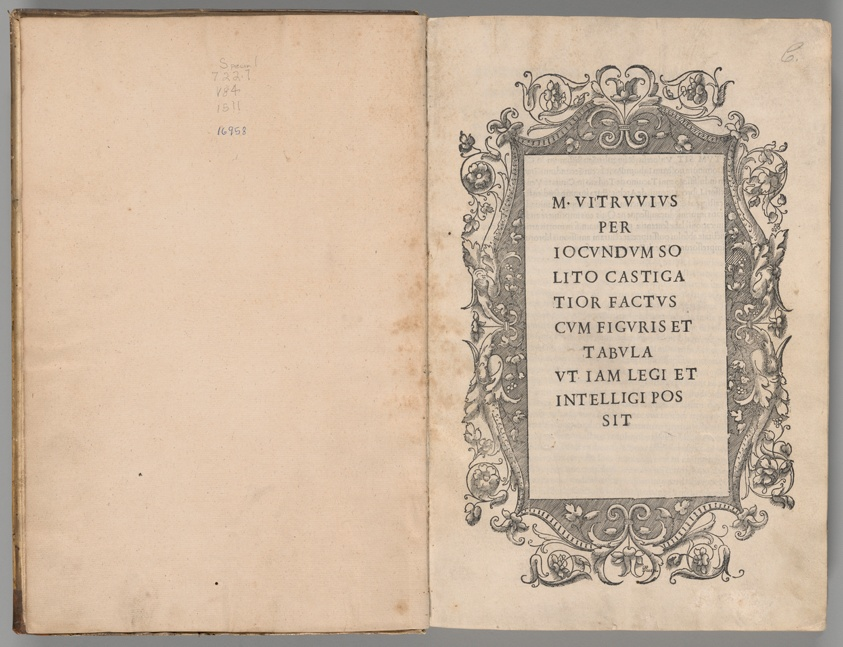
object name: Book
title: De Architectura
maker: Marcus Vitruvius Pollio (Roman, active first century BCE)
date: Venice, Italy: Ioannis de Tridino, also known as Tacuino, 1511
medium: Letterpress and woodcut in black on ivory laid paper; four-piece decorative woodcut title border with scrolling foliage and dolphin motifs; full alum-tawed ornamental leather binding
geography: Italy